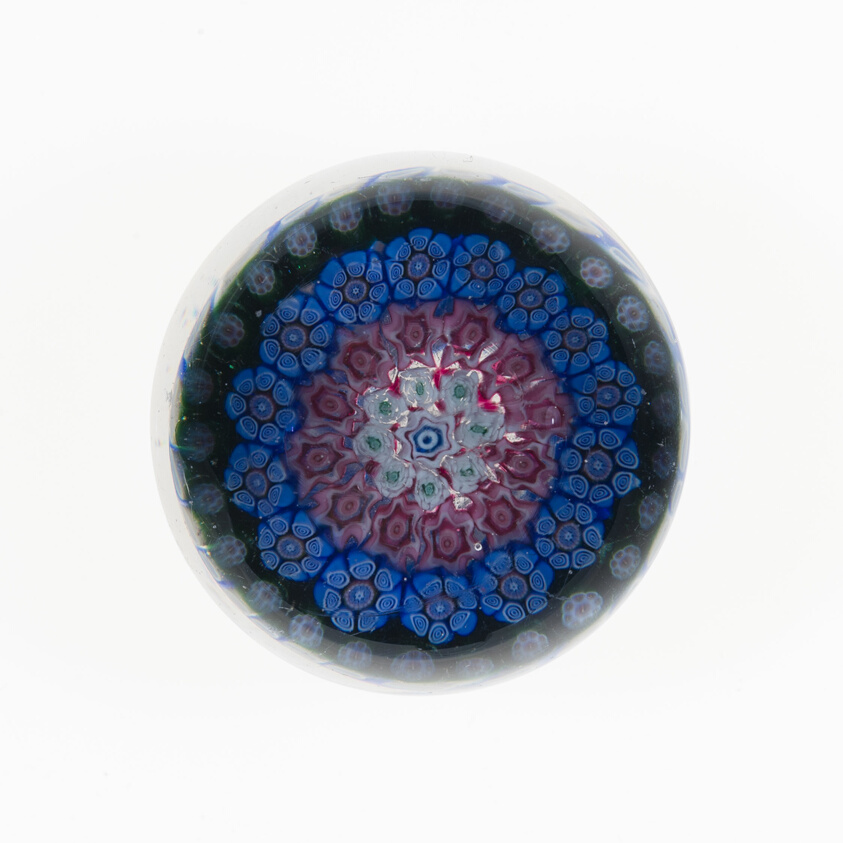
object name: Glass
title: Paperweight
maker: Czech Republic, Bohemia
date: Mid 19th century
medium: Glass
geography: Bohemia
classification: paperweight; millefiori; european decorative arts; glass